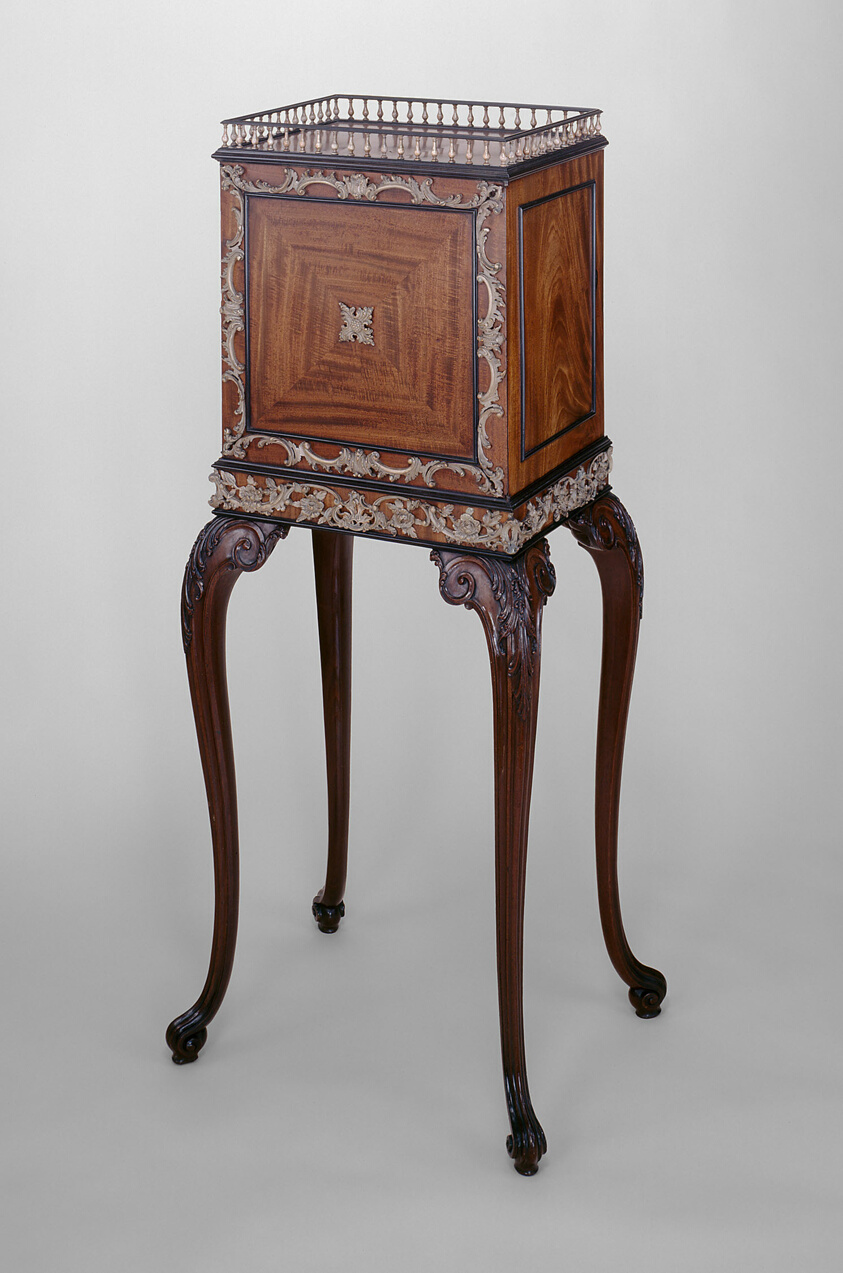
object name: Furniture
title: Cabinet on Stand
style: Rococo, 18th Century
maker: Attributed to William Vile (English, 1700/05–1767); London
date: c. 1760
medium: Mahogany, ebony, boxwood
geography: England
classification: furniture; case furniture; european decorative arts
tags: cabinets, furniture